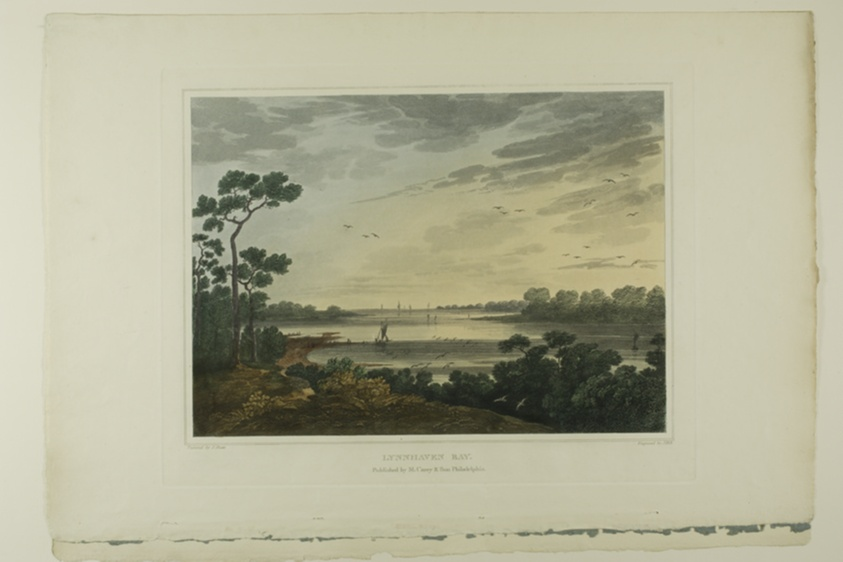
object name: Print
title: Lynnhaven Bay, plate one of the second number of Picturesque Views of American Scenery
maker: John Hill (American, 1770-1850); after Joshua Shaw (American, born England, c. 1777-1860); published by Matthew Carey & Son (American, active 1795-1821)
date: 1819/21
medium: Aquatint with etching and hand-coloring on cream wove paper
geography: United States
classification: aquatint; prints and drawing; print; portfolio